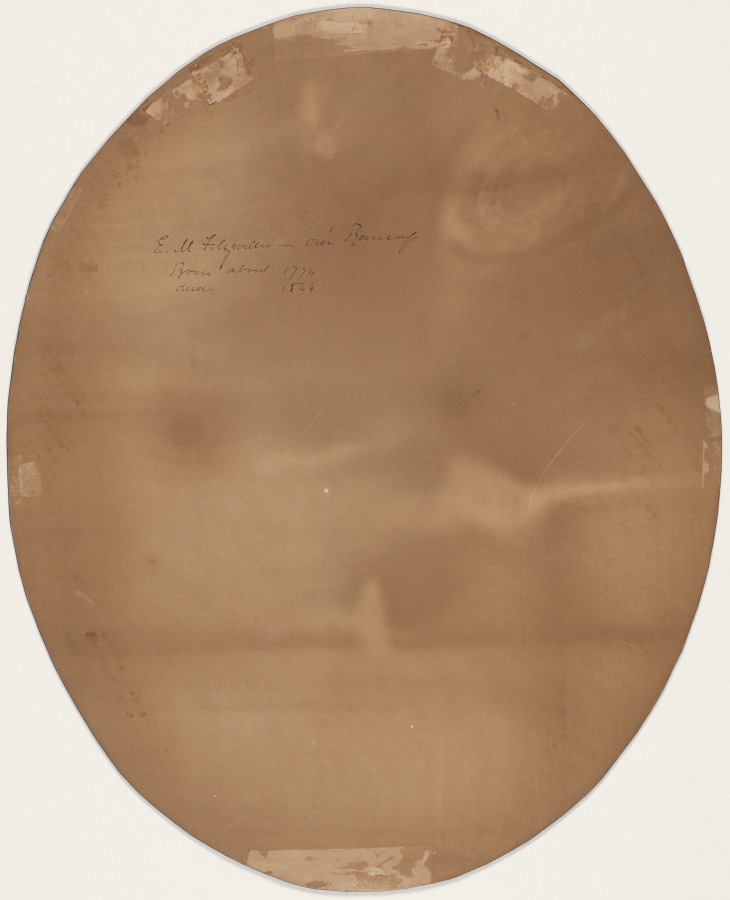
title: Portrait of Eleanor Ramsay Fitzwilliam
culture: France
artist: Charles Balthazar Julien Fevret de Saint-Mémin (French, 1770–1852)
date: c. 1790–1852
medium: Black and white chalk on buff paper with pink wash in original frame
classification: Drawing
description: This portrait and its pair (2024.35.1), depict George Fitzwilliam, an English merchant, and his American wife Eleanor Ramsay Fitzwilliam, who sat in New York for the French émigré artist Charles Balthazar Julien Févret de Saint-Mémin. Saint-Mémin used a recently invented mechanical device called a physiognotrace to trace accurate profiles of his sitters, which he then completed in black and white chalks. The technology enabled Saint-Mémin to establish a thriving business catering to prominent Americans—including Presidents Washington, Adams, Jefferson, and Madison, Benjamin Franklin, and several Native American chiefs—at a time when he was in exile from the French Revolution. As part of each commission, Saint-Mémin also supplied etchings of the portrait in a reduced size, which could be given as keepsakes to family and friends.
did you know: The physiognotrace device used to create this portrait consisted of a wooden frame within which a sitter posed in profile; the artist then peered through an eyepiece and followed the contour and features of the sitter’s face by maneuvering a graphite pencil attached to the mechanism.